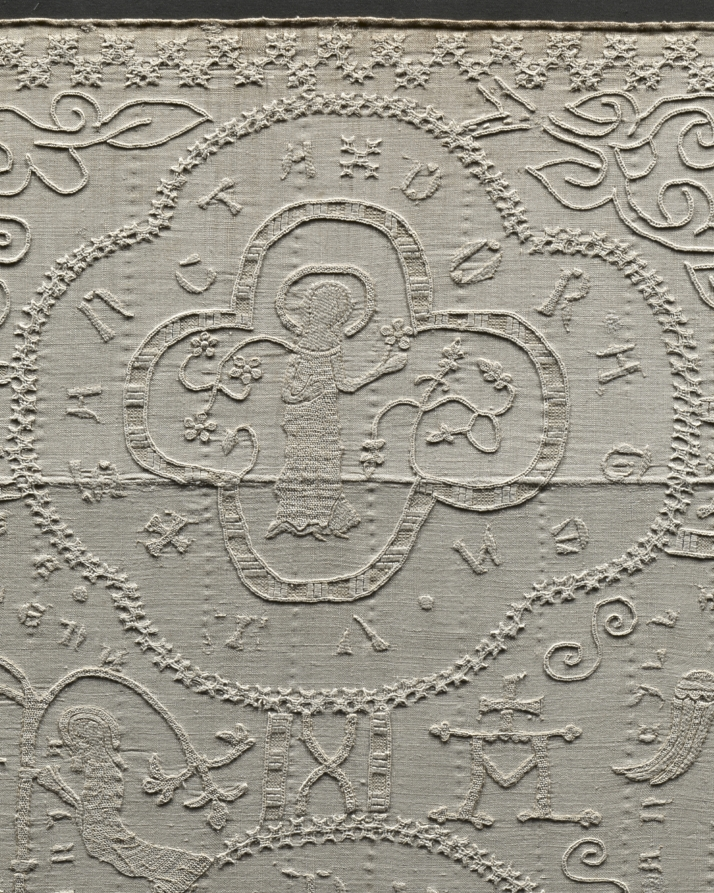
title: Altar Cloth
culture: Germany, Altenberg on the Lahn, Premonstratensian Convent, 14th century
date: c. 1350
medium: embroidery: linen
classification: Embroidery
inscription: various motifs enclosed in quatrefoils with identifying inscriptions in Gothic letters.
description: This large, embroidered altar cloth is one of the rarest, most important medieval church furnishings in existence. It was stitched by nuns in the Premonstratensian Convent in Altenberg on the Lahn River, north of Frankfurt, Germany, and was used to cover the church’s high altar in the weeks leading up to Easter. The cloth is an example of linen embroidery, a specialty of German nuns in the later Middle Ages. The Altenberg monastery church once had valuable furnishings; the high altar retable (a decorated frame with sculptures and paintings on the top of an altar) has survived, the main parts of which are now in the Städel Museum in Frankfurt, Germany.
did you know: When lit from behind, the previously hidden details emerge and the complex design becomes evident.